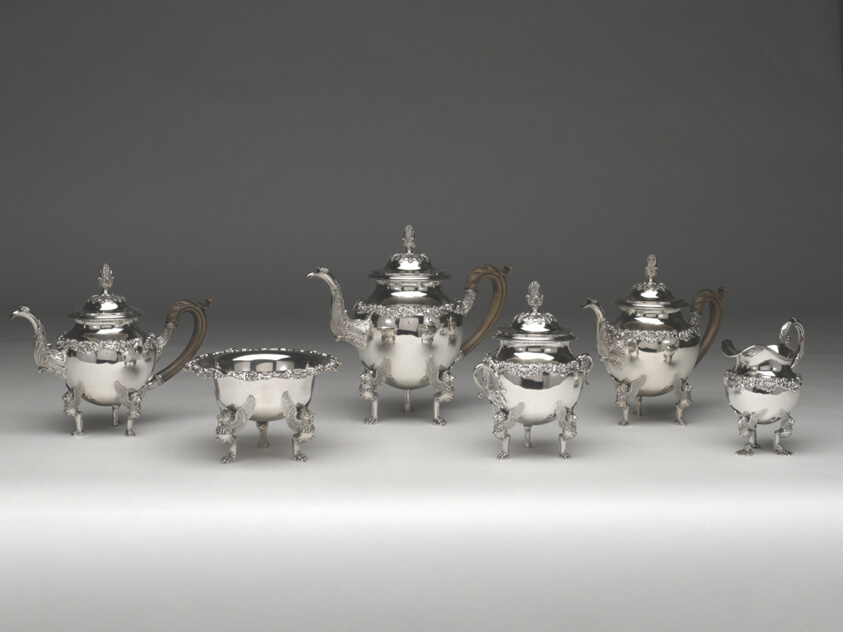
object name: Metalwork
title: Tea and Coffee Service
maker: Harvey Lewis; American, c. 1783–1835; Philadelphia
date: 1811–28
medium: Silver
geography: Philadelphia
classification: tea service; silver; american decorative arts; american arts; decorative arts